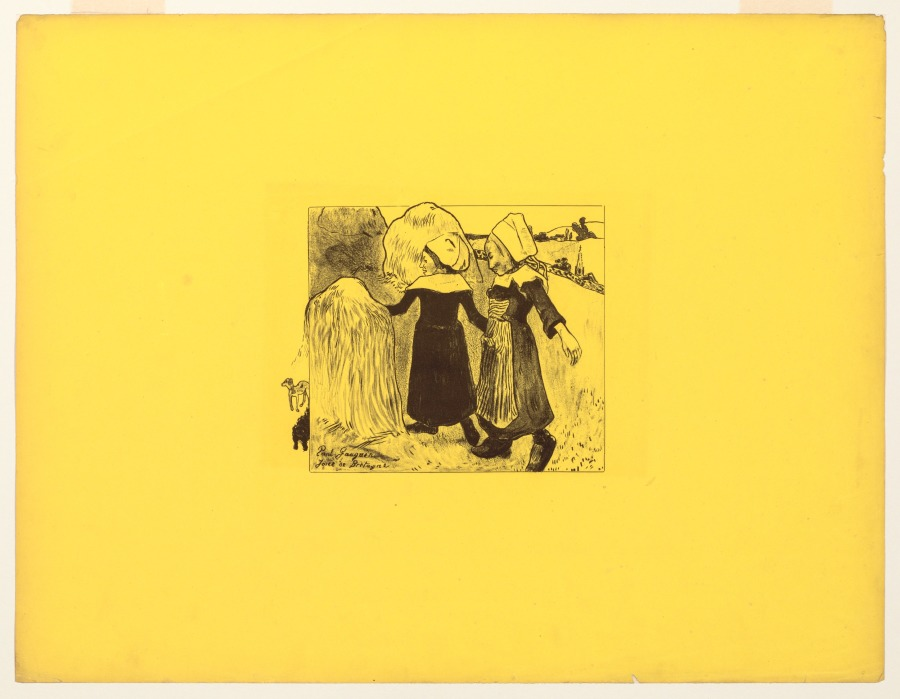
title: Volpini Suite: Joys of Brittany (Joies de Bretagne)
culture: France, 19th century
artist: Paul Gauguin (French, 1848–1903)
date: 1889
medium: zincograph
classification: Print